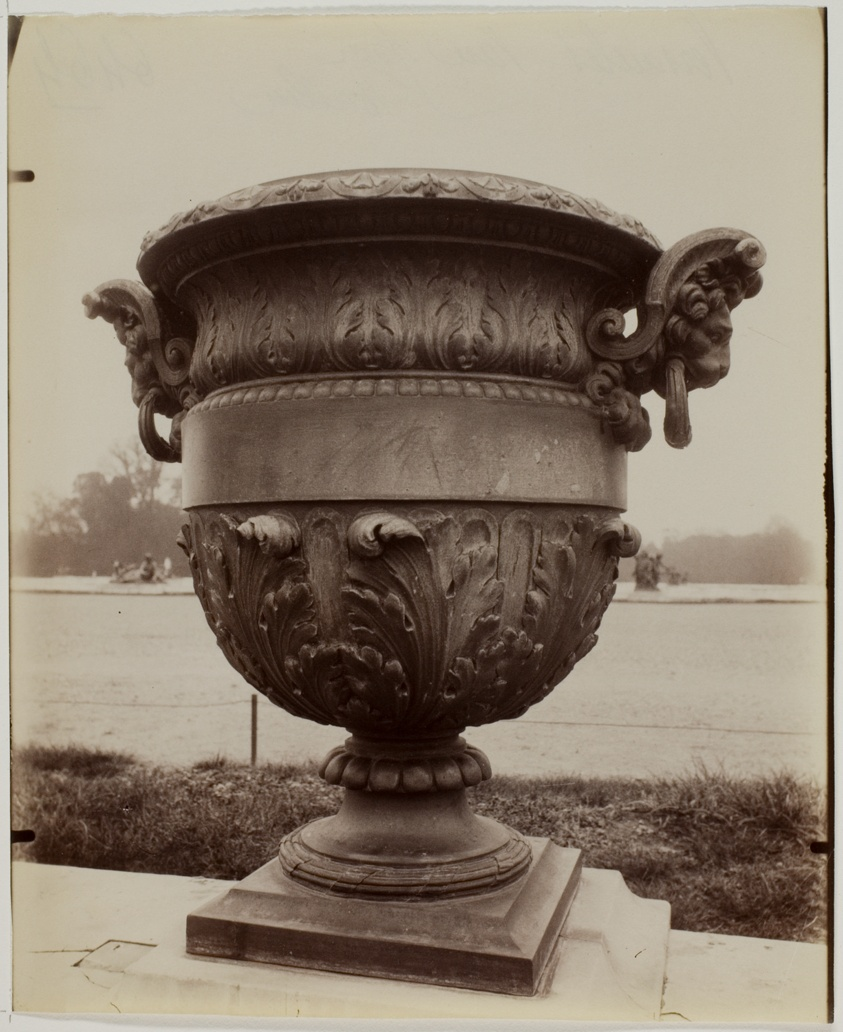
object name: Photograph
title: Versailles, Vase par Ballin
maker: Jean-Eugène-Auguste Atget (French, 1857–1927)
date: 1904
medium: Albumen print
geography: France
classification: albumen silver print; photographic process; photography; photograph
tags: Collected by Hugh Edwards